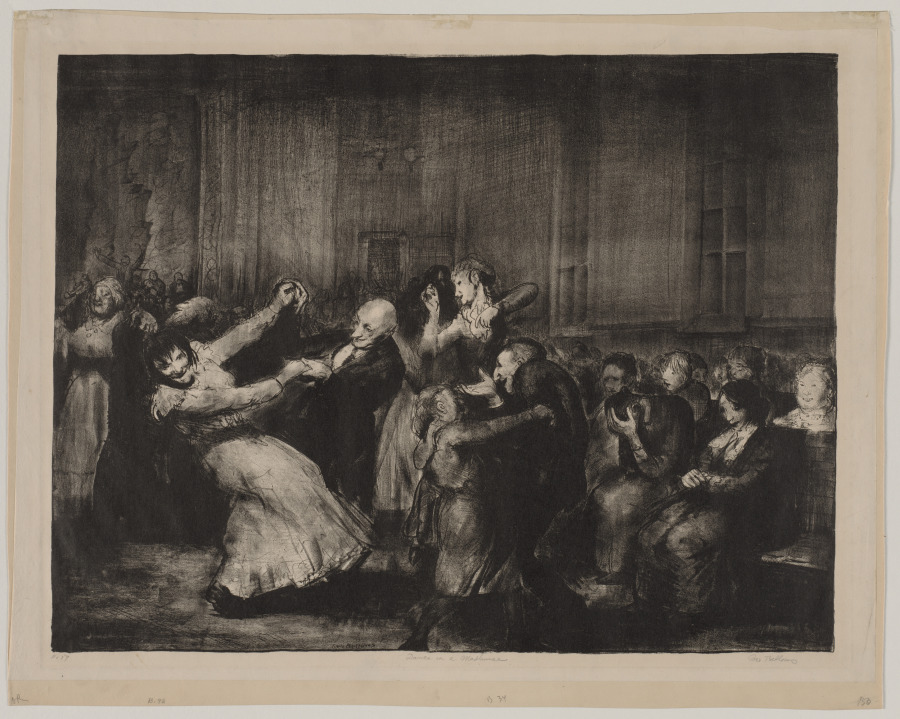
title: Dance in a Madhouse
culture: America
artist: George Bellows (American, 1882–1925)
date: 1917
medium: lithograph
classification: Print